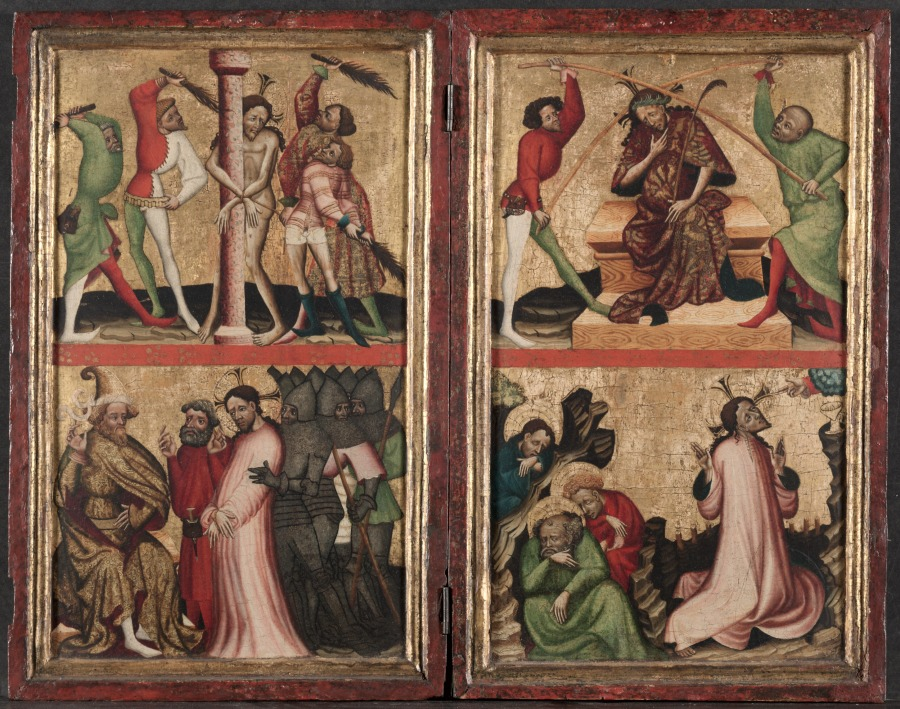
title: Diptych with the Passion of Christ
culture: Austria, Styria, 15th century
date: c. 1400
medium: tempera and gold on wood oak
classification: Painting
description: This diptych, or two-panel painting, is hinged at the center so that it could be opened and closed and easily transported. It was clearly designed as an object for private devotion. The owner would have been able to contemplate the Passion of Christ and pray before these scenes. The top two images depict Christ’s scourging at the pillar and the crowning of thorns, while the lower two show Jesus before Pontius Pilate and in the Garden of Gethsemane. The scenes would have been read clockwise beginning with the lower right. On the back of these panels are remnants of paintings that have since been scraped off.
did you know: This painting was probably not originally a diptych but part of a larger ensemble.